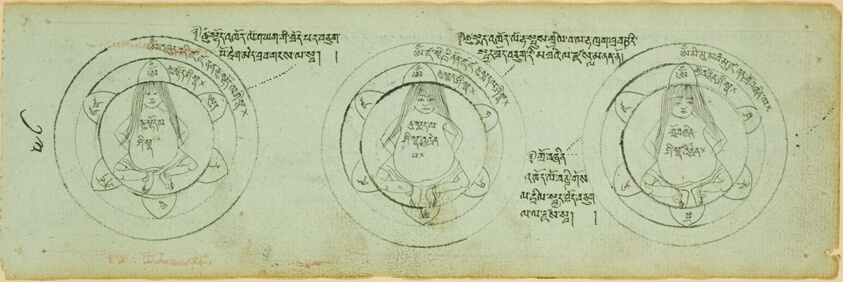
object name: Painting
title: Page from a Manuscript with Diagrams Protecting against Children's Illnesses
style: Himalayan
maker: Tibet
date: 19th century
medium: Ink and watercolor on paper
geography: Tibet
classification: pen and ink drawings; manuscript; asian art; painting